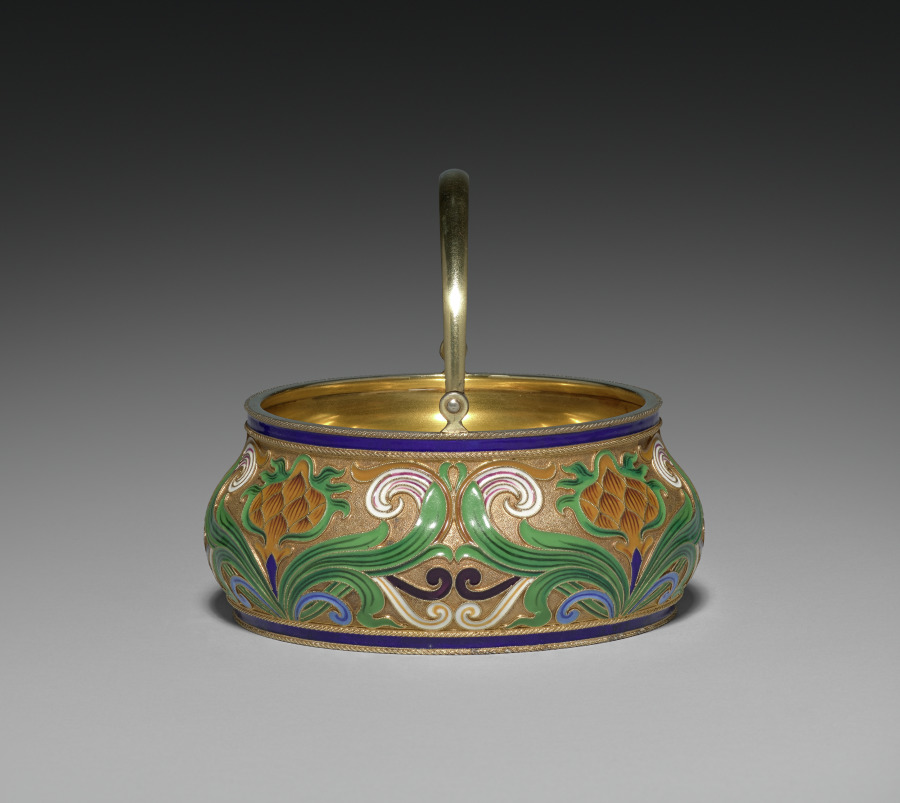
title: Jam (Varenye) Basket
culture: Russia, St. Petersburg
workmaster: attributed to Feodor Ivanovich Rückert (Russian, 1840–1917)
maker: House of Fabergé (Russian, 1842–1918)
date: 1887–96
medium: silver gilt, opaque cloisonné enamel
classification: Miscellaneous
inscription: 84, St. George [assay mark for Moscow, 1882-1896]; C. Fabergé (in Cyrillic); double-headed eagle [imperial warrant]; 10593 scratched.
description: A particularly Russian component of this tea service is this little basket, meant to hold fruit preserved in a sweet juice, called varenye. At Russian tea, varenye was strained and served over cakes or biscuits in a similar way that the English take jam with scones at high tea.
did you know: This jam (varenye) basket is part of a larger tea set.